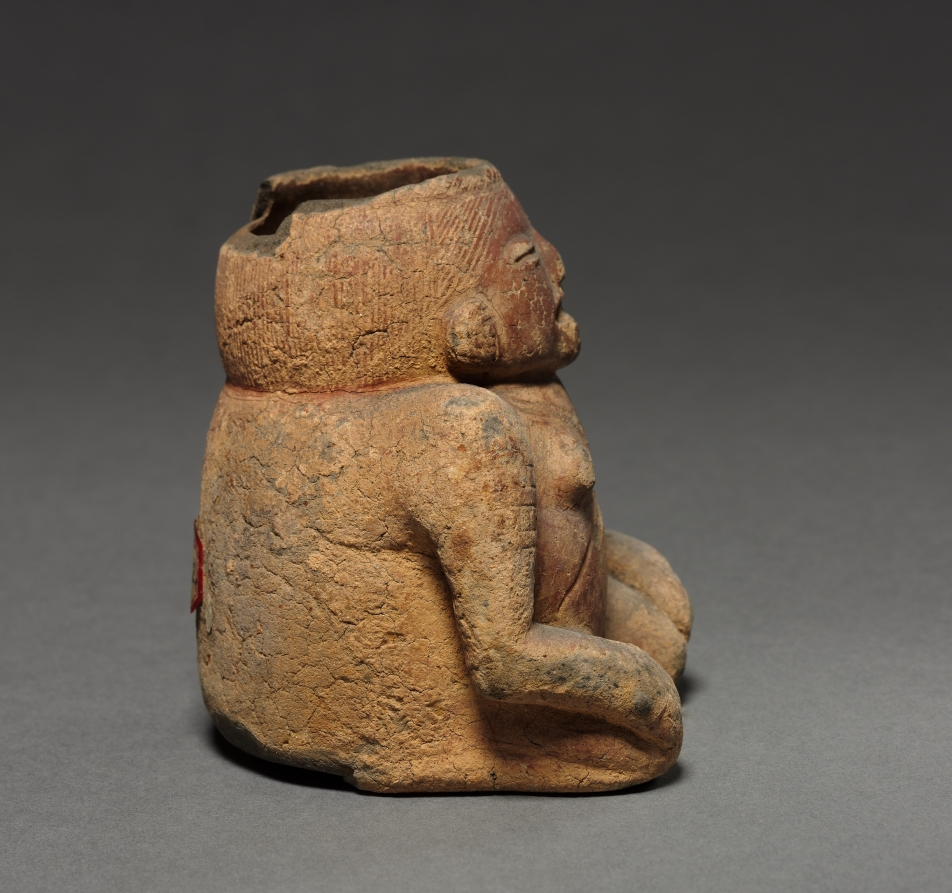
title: Figure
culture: Colombia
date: before 1550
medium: red ware with incised patterns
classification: Ceramic